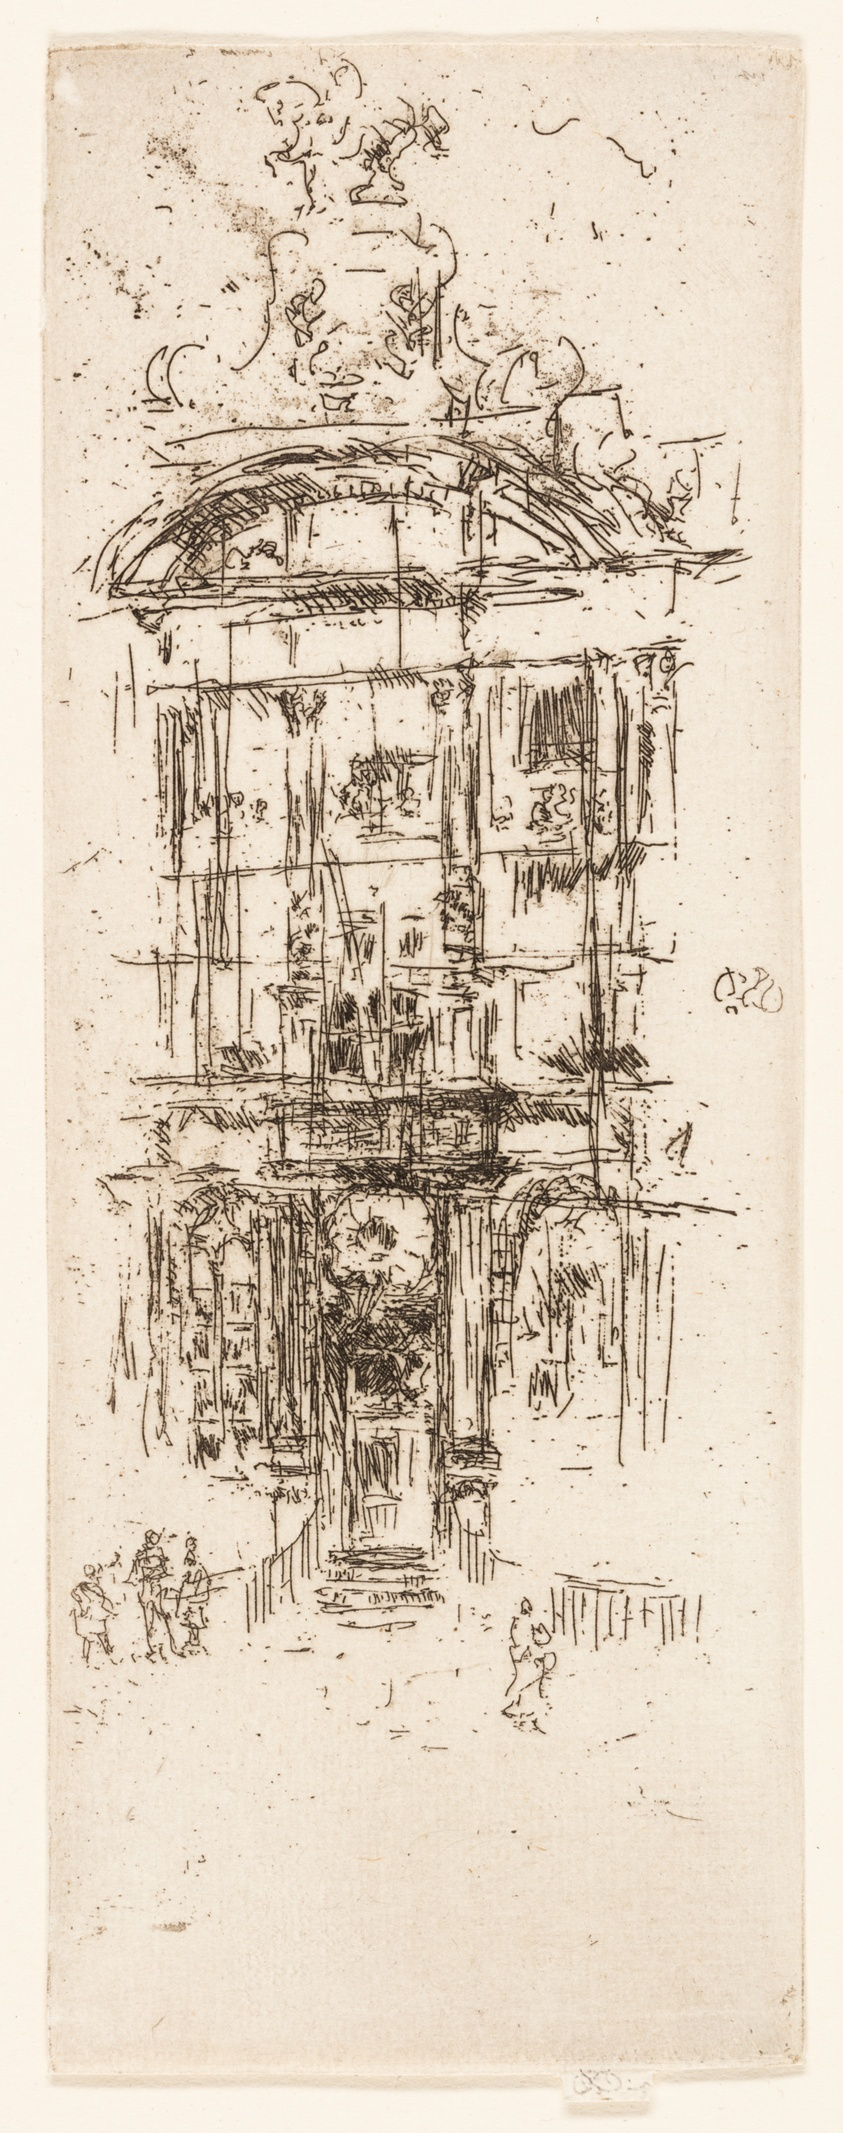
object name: Print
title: Gold House, Brussels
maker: James McNeill Whistler (American, 1834-1903)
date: 1887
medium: Etching with foul biting in black ink on off-white laid paper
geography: United States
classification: etching; foul biting; print; prints and drawing; paper